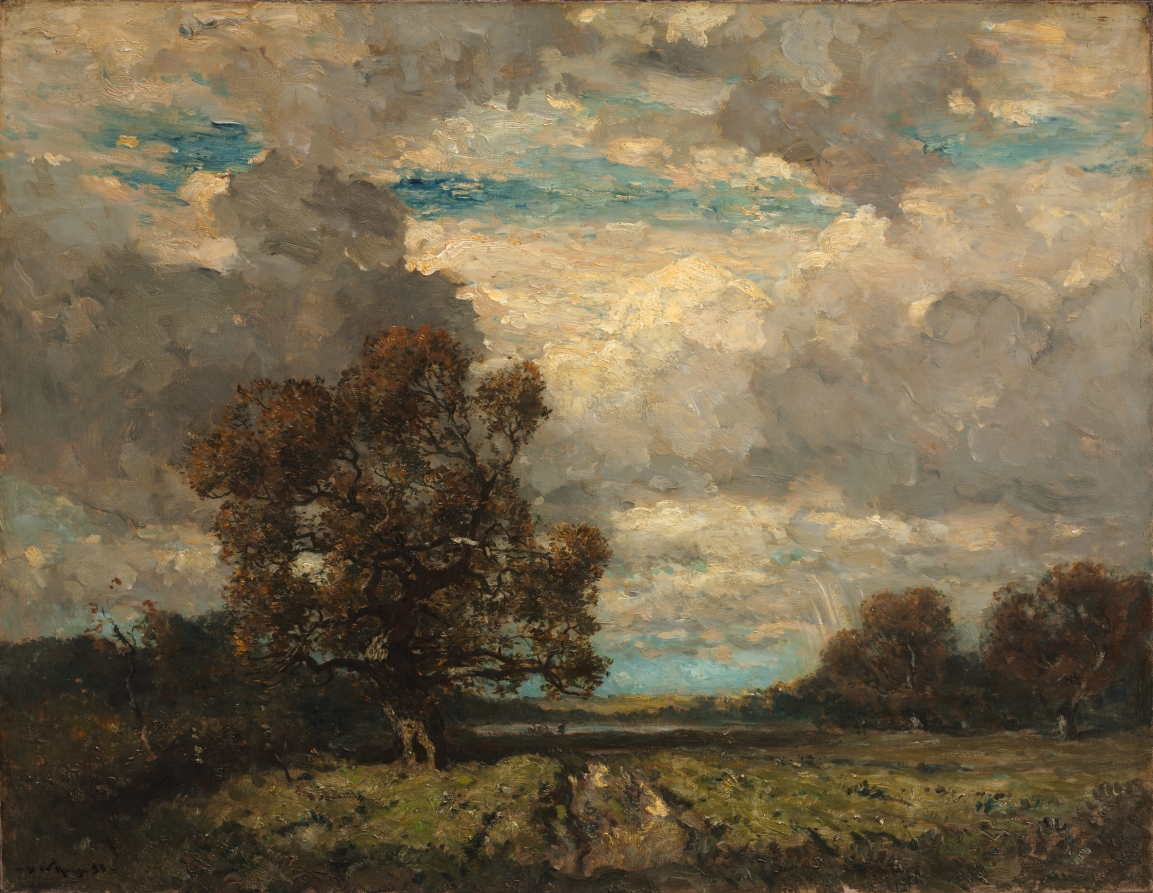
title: The Lone Sentinel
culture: America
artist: Henry Ward Ranger (American, 1858–1916)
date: 1895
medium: oil on canvas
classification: Painting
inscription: Signed lower left: "H W Ranger 95"